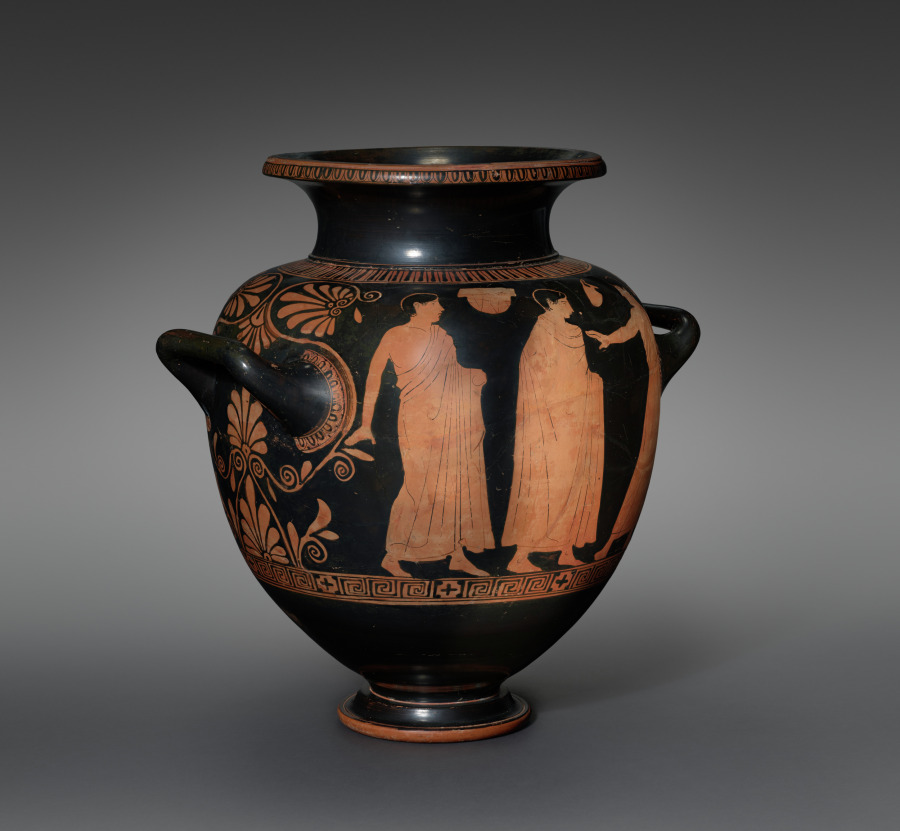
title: Red-Figure Stamnos (Mixing/Storage Vessel): Komos (Musicians and Revelers)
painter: attributed to Kleophon Painter (Greek, Attic, active c. 440–410 BCE)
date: c. 435–425 BCE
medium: Ceramic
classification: Ceramic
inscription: Κ Α Λ Ο Σ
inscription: Κ Α Λ Ο [Σ]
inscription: black '080'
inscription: black 'WF2'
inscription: black '0.19'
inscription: red '09.6'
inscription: partially removed red and white sticker, with number blacked out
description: Four lively figures move to the right across the front side of this stamnos, a vase used for storing and mixing wine. First comes a finely dressed woman playing the pipes, followed by three male figures, all nearly nude. The bearded one holds a drinking cup and reaches back, perhaps dancing, while the last in line concentrates on the music of his lyre.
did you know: The Athenian stamnos, a shape favored by the Etruscans, was made primarily for export.